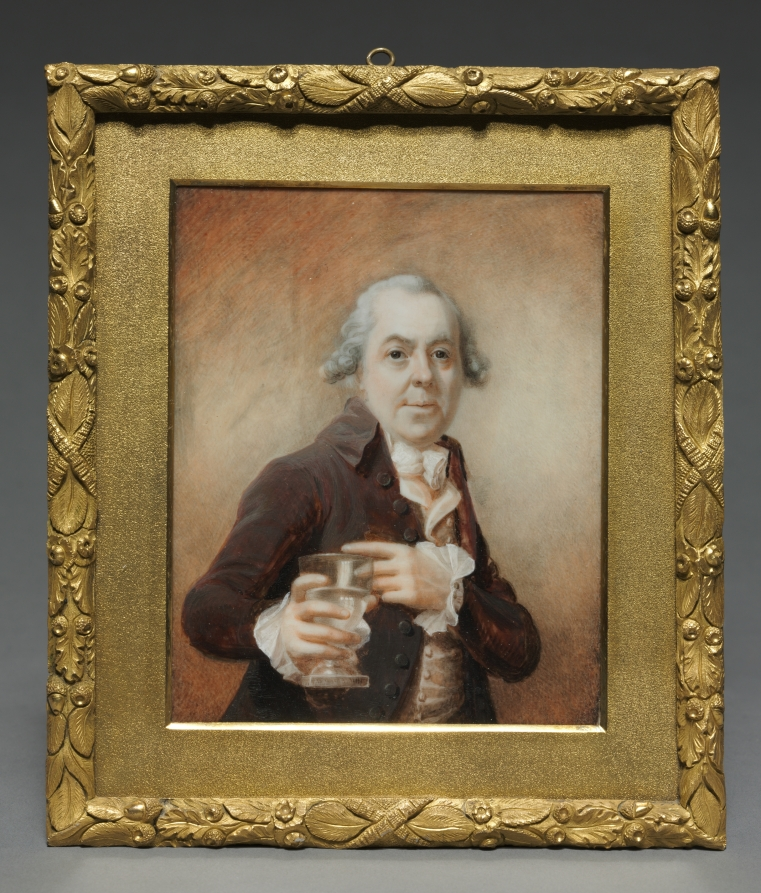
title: Portrait of a Man Holding a Glass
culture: England, late 18th century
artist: Joseph Daniel (British, c. 1760–1803)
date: c. 1780s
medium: watercolor on ivory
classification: Portrait Miniature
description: Joseph Daniel was the son Nochaniah Daniel of Bridgewater, Somerset, and among the first known Jewish artists of South West England. Joseph’s work has often been confused with that of his brother Abraham, with whom he competed for patronage. Neither commonly used his forename in signature nor in advertisement, possibly with a view to capitalize on the other’s clientele. Little is known about the brothers’ education apart from the fact that they were trained by their mother. Joseph seldom exhibited his miniatures in public. Only in recent years has there been an increased confidence in distinguishing his works from those of Abraham, resulting from the discovery of a handful of miniatures signed with first initials. The primary distinction between their styles is usually cited as Joseph’s greater attention to detail and his use of gray tones in shading. This outstanding miniature dating from the 1780s is unsigned, as was typical of Daniel’s practice. The sitter is conventionally dressed, wearing a powdered wig and a cream-colored cravat and waistcoat under a dark brown frock coat against which the delicacy of the translucent frilled cuffs is especially pronounced. There is evidence on the painted surface that Daniel adjusted the position of the index finger on the man’s left hand as well as the rightmost curls of his wig. The background is a mottled rusty brown, spot lit to pale brown in the center. The pallor of the sitter’s face, framed by gray hair and a blanched background, reinforces the intensity of his dark eyes, which confront the viewer directly. The face is sensitively described with broad gray shadows. Daniel’s attention to detail is evident in the reflection of the window in the curved glass of the goblet. The goblet, while acting as a central element in the picture, is not a refined object; instead, it is a heavy, plain vessel significant for its contents: water from Bath’s natural hot springs. This type of virtuoso portrait may have been displayed in the artist’s studio to attract clients and refers to the spa culture of Bath, a critical site for social maneuvering in eighteenth- and early-nineteenth-century England.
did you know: While some highly successful artists were able to support themselves by working only in miniature, it was more common for them to work in a variety of media like Joseph Daniel who was a miniature painter, engraver, and jeweler who also executed pictures in oil, crayon, and hairwork.